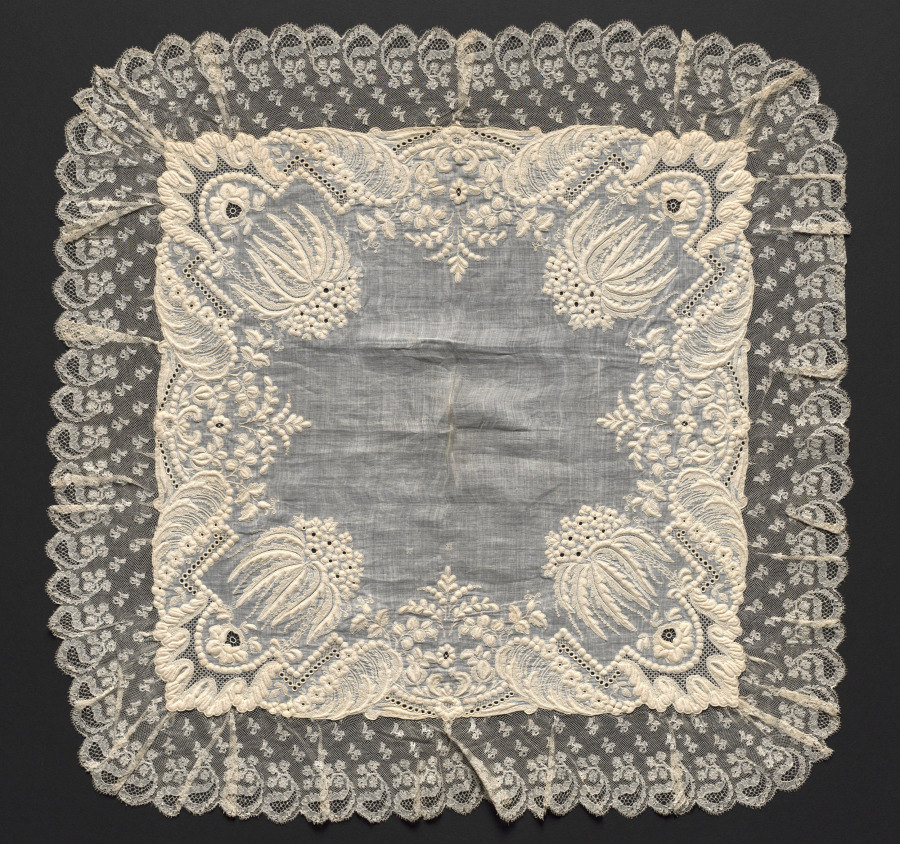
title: Lace Handkerchief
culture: Flanders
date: 1800–1820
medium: Plain weave linen center with cut and drawn work and embroidery; bobbin lace edging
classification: Embroidery